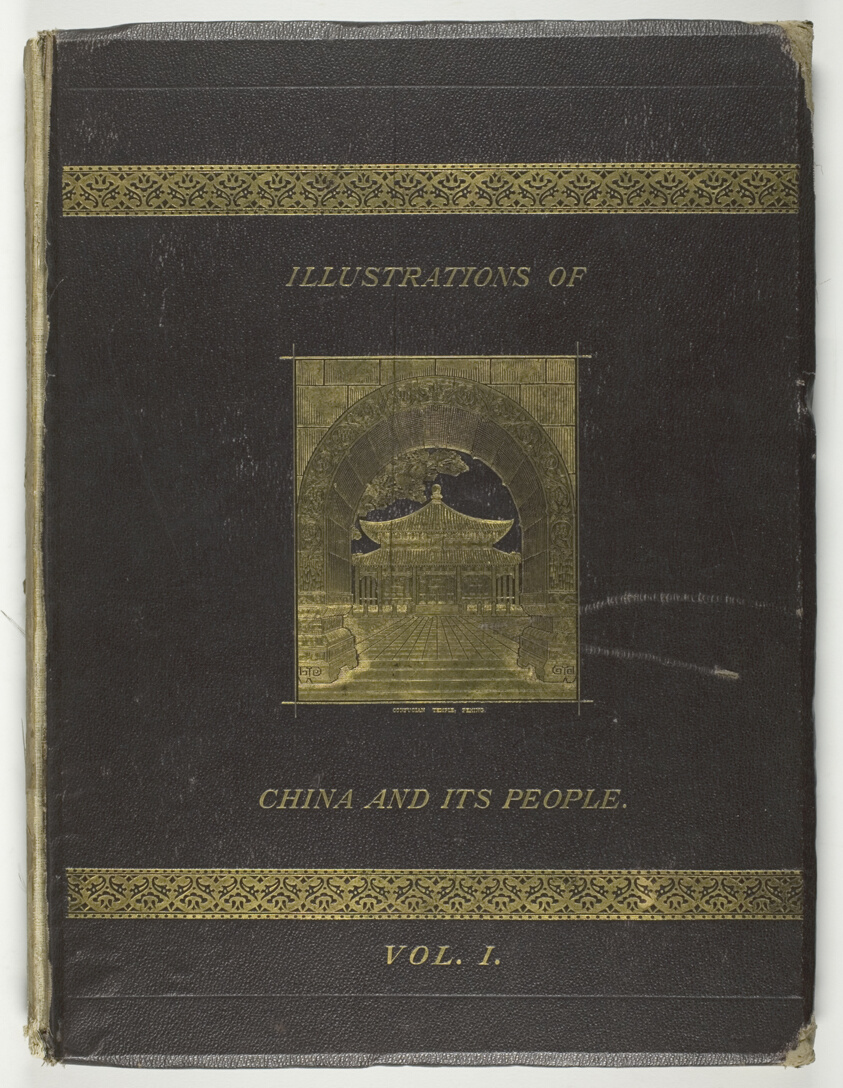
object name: Photograph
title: China and Its People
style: 19th century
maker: John Thomson (Scottish, 1837–1921)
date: 1873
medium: Collotypes (96 plates; 218 photographs in all four volumes) and text, volume one of four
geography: Scotland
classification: collotype; photomechanical process; photography; photograph